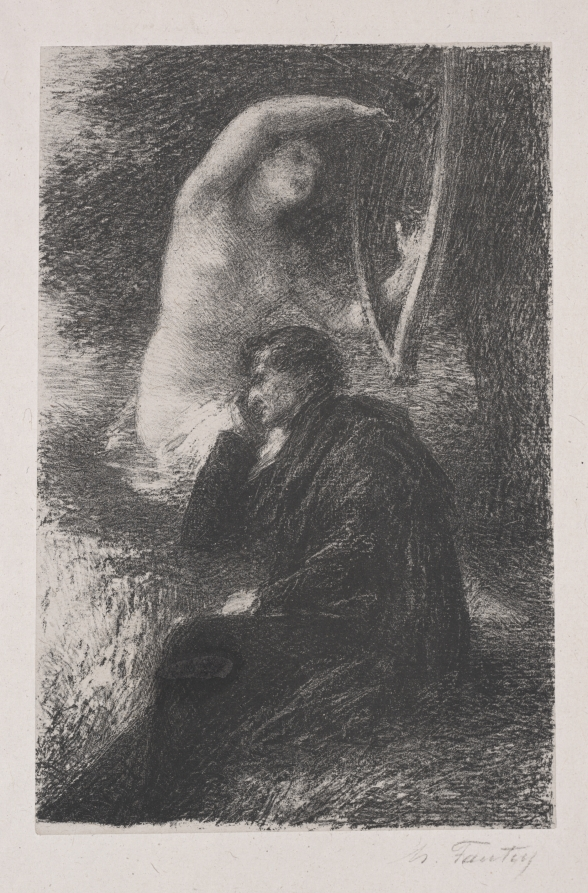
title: Lélio: The Aeolian Harp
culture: France, 19th century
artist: Henri Fantin-Latour (French, 1836–1904)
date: 1888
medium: lithograph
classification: Print